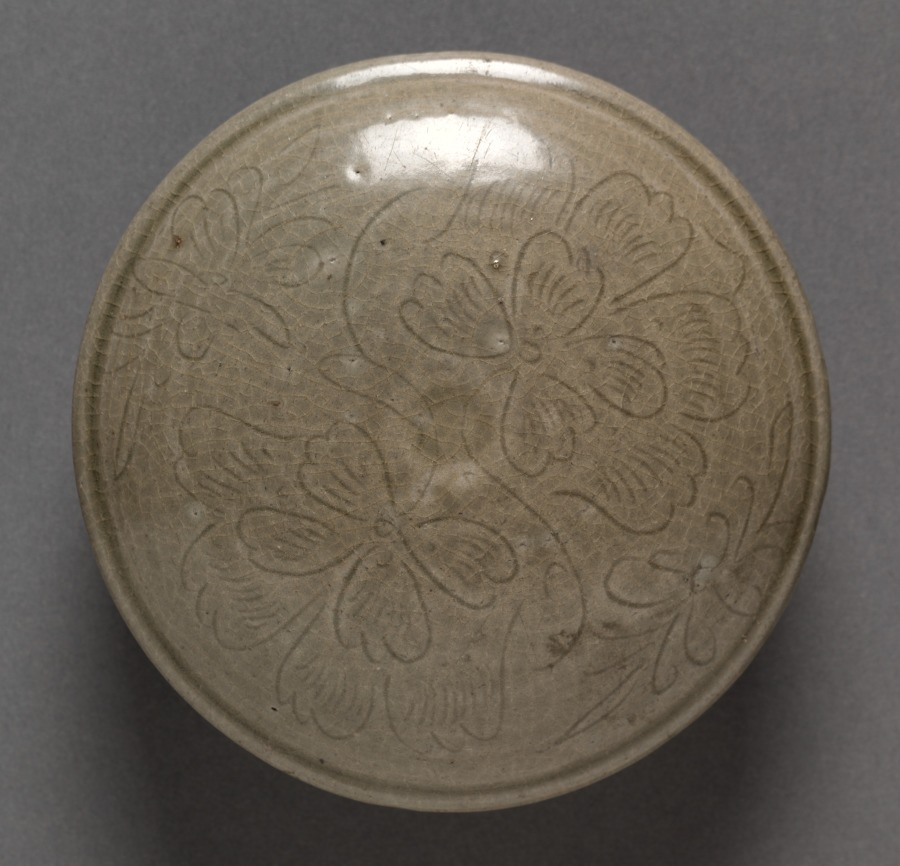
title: Box: Yue ware (lid)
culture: China, Zhejiang province, Song dynasty (960-1279)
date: 960–1279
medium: glazed stoneware with incised decoration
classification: Ceramic